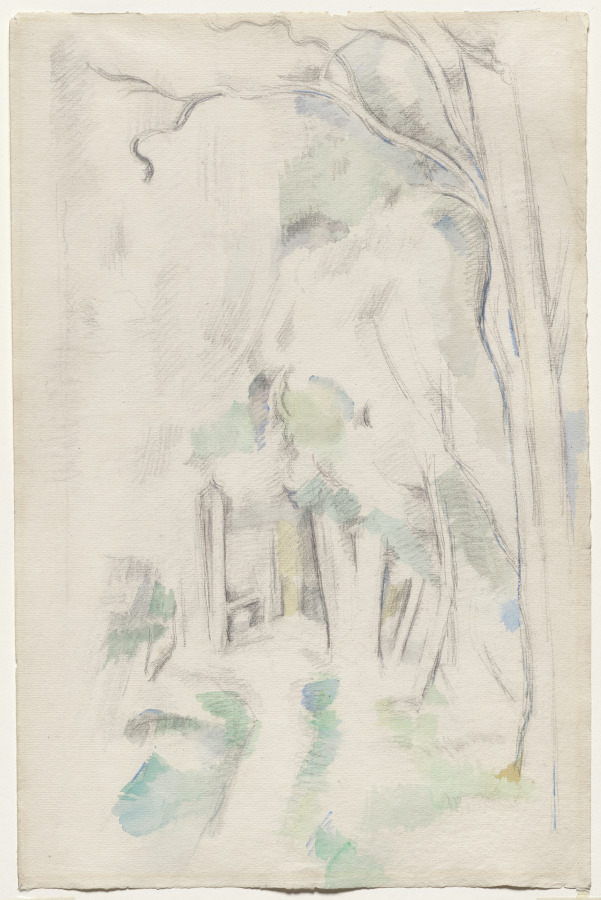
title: Footpath in the Woods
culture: France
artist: Paul Cezanne (French, 1839–1906)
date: 1882–84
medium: watercolor and graphite on modern laid paper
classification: Drawing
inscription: signed, in pencil, on verso: Vollard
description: Paul Cezanne is known for moving beyond the visible brushwork of Impressionism toward a “constructive stroke,” in which each mark built a cohesive whole. He favored subjects that he saw as timeless, including landscape, the focus of this watercolor. Cezanne depicted chestnut trees at the Jas de Bouffan, his family estate outside Aix-en-Provence in southern France. He used graphite lines and areas of muted watercolor, but also the whiteness of his sheet of paper to represent the scene. The artist worked in watercolor throughout his entire career, seeing it as a site of experimentation and for developing new ideas.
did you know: This drawing was once owned by collectors Leo and Gertrude Stein, in whose Parisian apartment it would have been seen by a young Pablo Picasso.